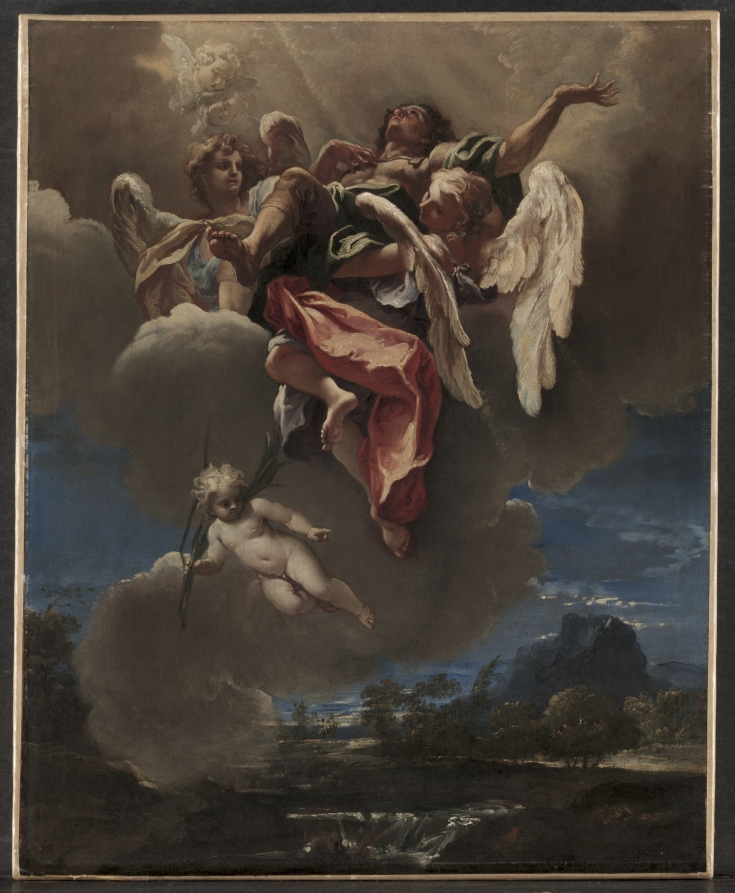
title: Study for "An Apotheosis of a Saint" (for San Bernardino dei Morti, Milan)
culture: Italy, 17th century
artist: Sebastiano Ricci (Italian, 1659–1734)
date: c. 1695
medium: oil on canvas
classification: Painting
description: This sketch represents an apotheosis, or a rise to heaven, of a saint. However, the precise identity of the figure remains unknown, since documents describing the commission have not yet been discovered, and the military costume does not sufficiently distinguish him.